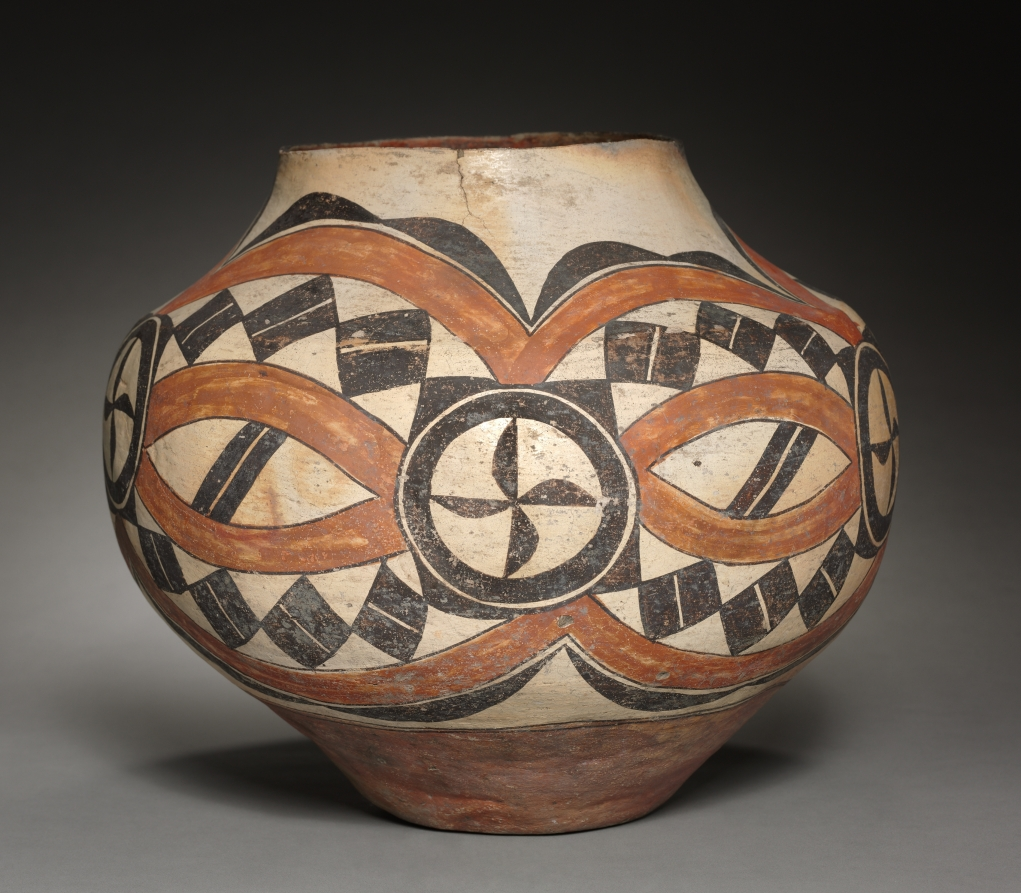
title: Jar (Olla)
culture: Southwest, Pueblo, Acoma, Laguna, Post- Contact Period,19th century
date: 1875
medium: pottery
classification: Ceramic